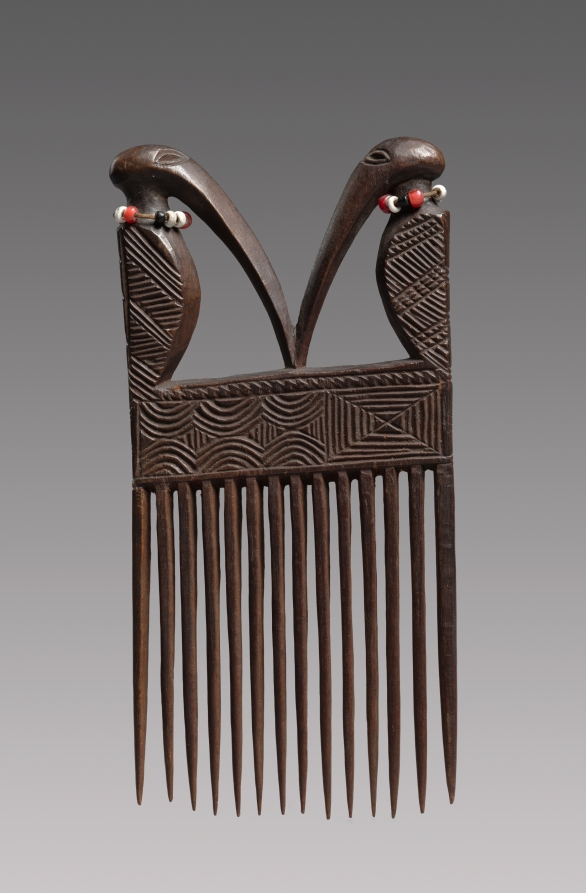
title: Comb (cisakulo)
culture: Africa, Central Africa, Angola, or Democratic Republic of Congo, Chokwe-style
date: mid- to late 1800s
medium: Wood, glass beads, and natural fibers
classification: Jewelry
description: Chokwe women and men inserted finely decorated combs and pins in their hair to signal rank and wealth. Here, as among neighboring peoples, hairstyles reflected changing trends across place and over time. This comb's wooden material and sculptural top made it of a higher value than simple examples made from metal or cane. Its wide teeth were practical, securing elements of a hairstyle in place. The long-beaked ngungu birds with beaded necklaces were a well-known symbol of chiefly power. In addition to being a sign of beauty and good health, a well-styled hairdo also suggests that the wearer relies on the help of others in its creation. Combs were often gifted to women by admirers or husbands to mark important life events. This comb entered the Cleveland Museum of Art's collection in 1915, one year before the museum opened its doors.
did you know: The double birds on this comb are the ngungu, a kind of hornbill linked to hunting and the related power of leaders. They were considered a good omen, and served as mediators between the earthly world and the spiritual one.